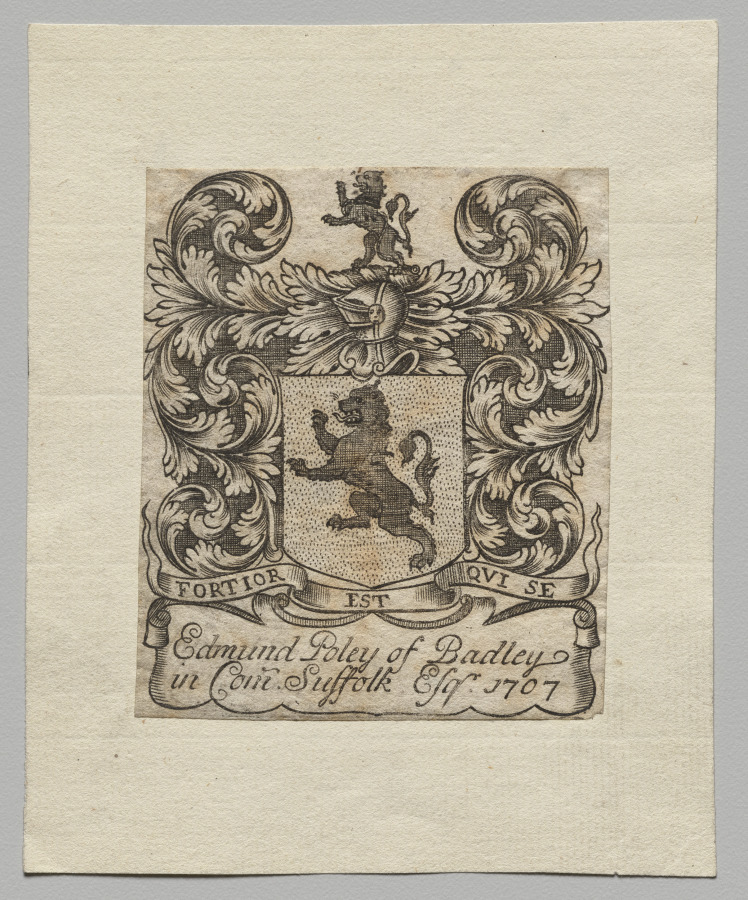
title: Bookplate: Edmund Poley of Badley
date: 1707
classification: Print